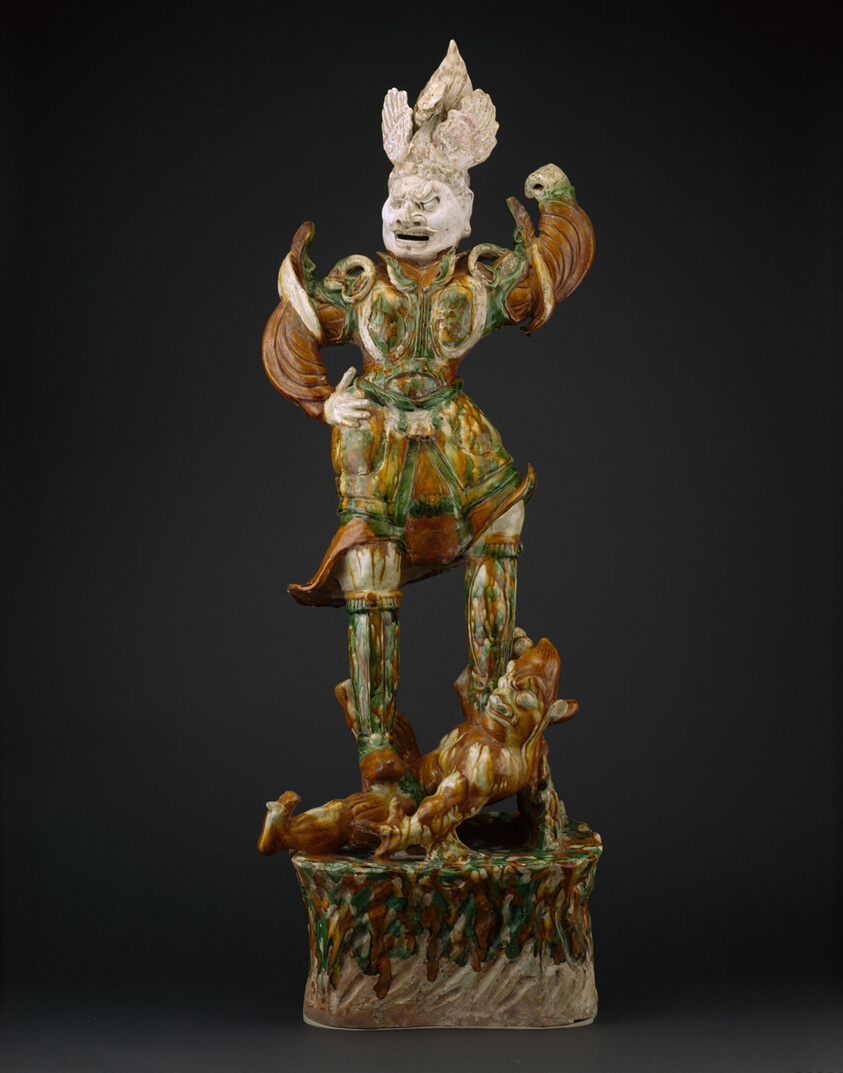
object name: Sculpture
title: Armored Guardian King (Tianwang) Trampling Demon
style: Chinese (culture or style)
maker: China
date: Tang dynasty (618–907 A.D.), first half of 8th century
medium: Earthenware with three color (sancai) lead glazes and traces of pigments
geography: China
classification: earthenware; asian art; ceramics; sculpture